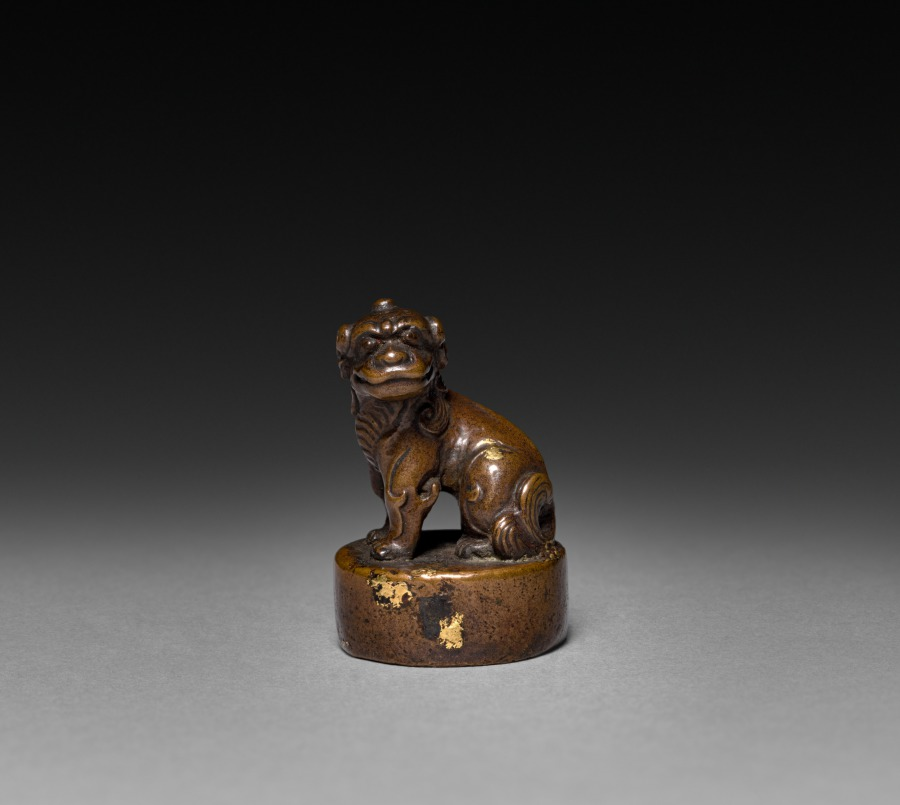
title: Seal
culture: China, Ming dynasty (1368-1644) or earlier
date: 1368– 1644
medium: bronze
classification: Metalwork